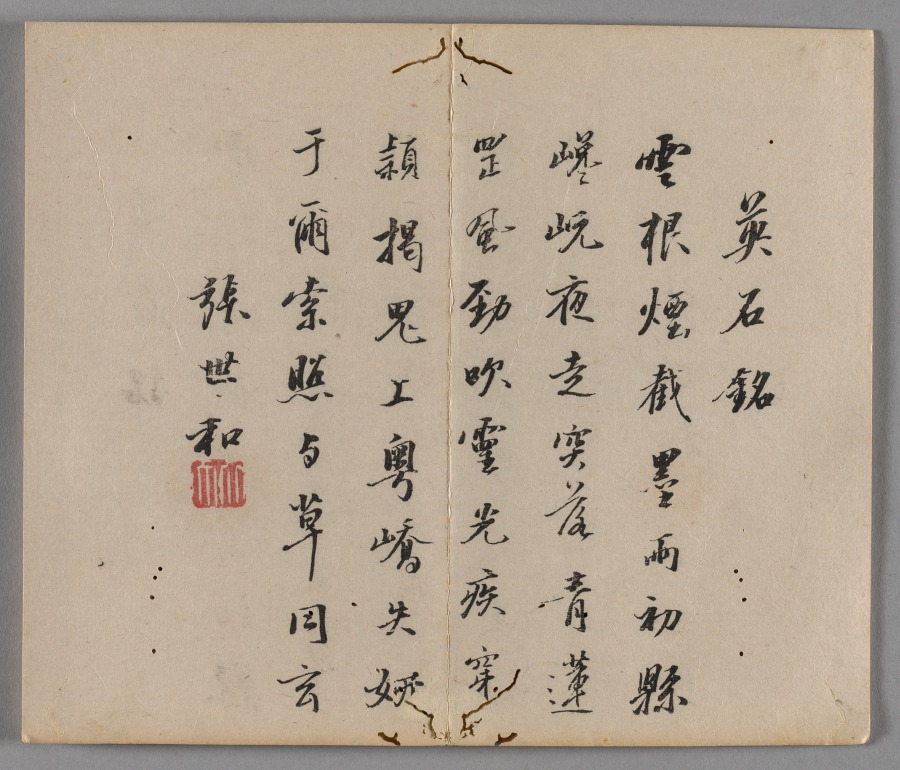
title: Ten Bamboo Studio Painting and Calligraphy Handbook (Shizhuzhai shuhua pu): Rocks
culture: China, Qing dynasty (1644-1911)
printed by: Hu Zhengyan (Chinese, c. 1584–1674)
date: 1633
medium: Woodblock-printed book; ink and colors on paper; first edition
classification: Print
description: Color printing reached a level of perfection in the early 1600s, as seen in this Ten Bamboo Studio Collection of Calligraphy and Painting and the Mustard Seed Garden Manual of Painting (printed 1679 and 1701). The painterly quality, precision in registering (aligning) the woodblocks, and harmonious colors made them the most successful color print editions in Chinese history. Both editions were printed and compiled in Nanjing, spread nationwide, and had a great impact on the arts in Japan and Korea.